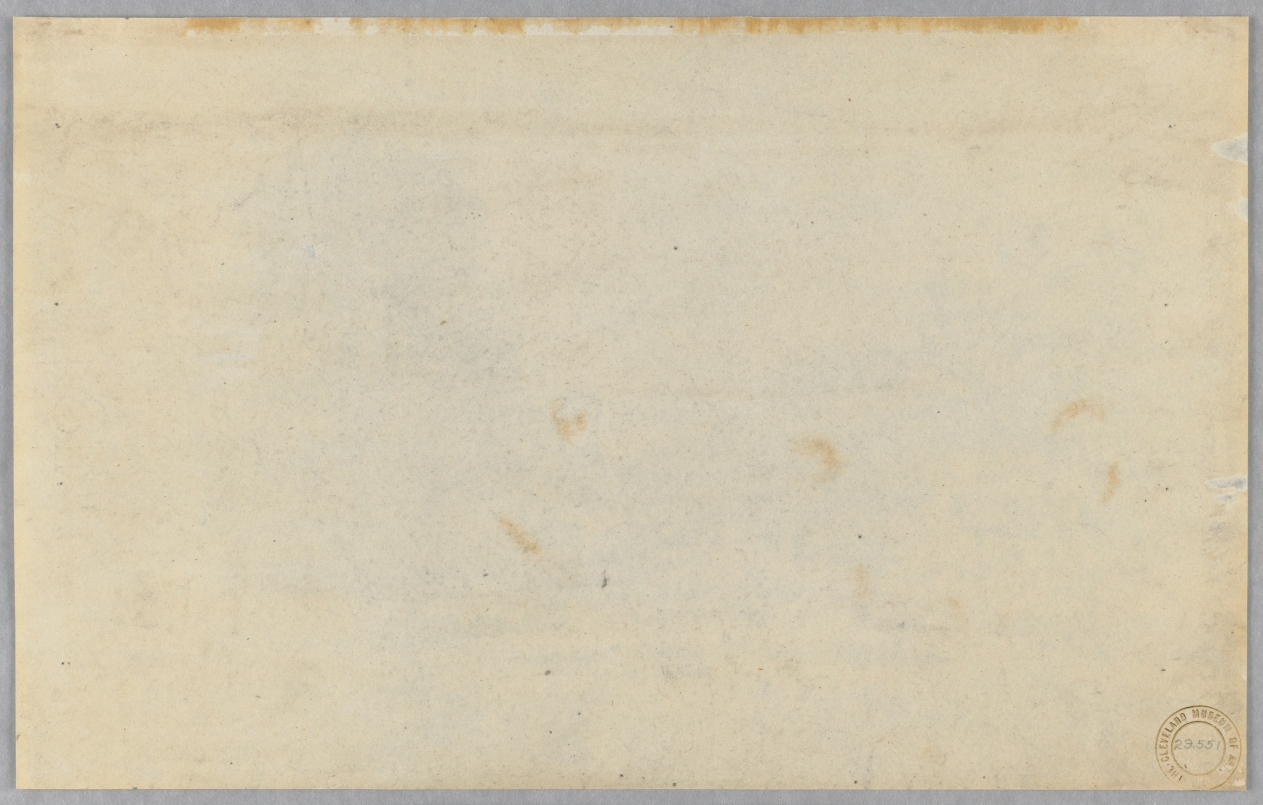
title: Landscape with Trees Surrounding a Pond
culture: England, 19th century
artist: John Constable (British, 1776–1837)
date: c. 1800–37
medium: graphite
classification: Drawing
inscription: Watermark: 1811